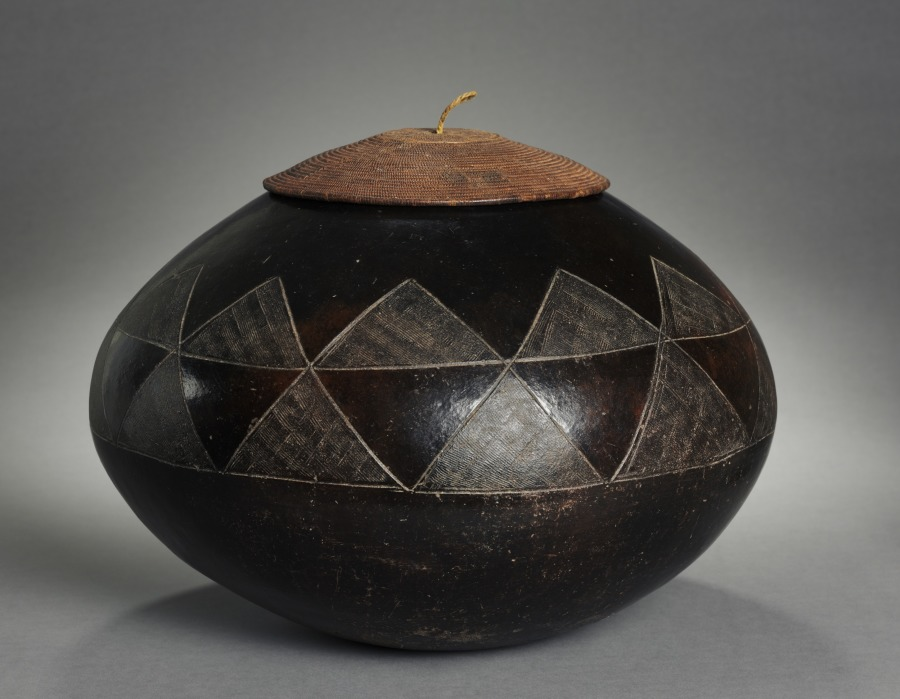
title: Lidded Pot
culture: Southern Africa, South Africa, Zulu, mid-20th century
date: 1900s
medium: Terracotta and plant fiber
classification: Vessels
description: This large, beautifully shaped vessel was used for the serving of beer, an essential component of Zulu hospitality. Undecorated vessels were for private household use, and ornamented examples were reserved for guests. Zulu pottery is produced by women, and is typically thin-walled, with a burnished black surface. Decoration may be incised around the shoulder, as in this example, or may consist of raised bumps that resemble body scarification. The basketry lid protects the vessel's contents from flies or debris; contemporary pot lids are often woven of telephone wire with a colorful plastic coating